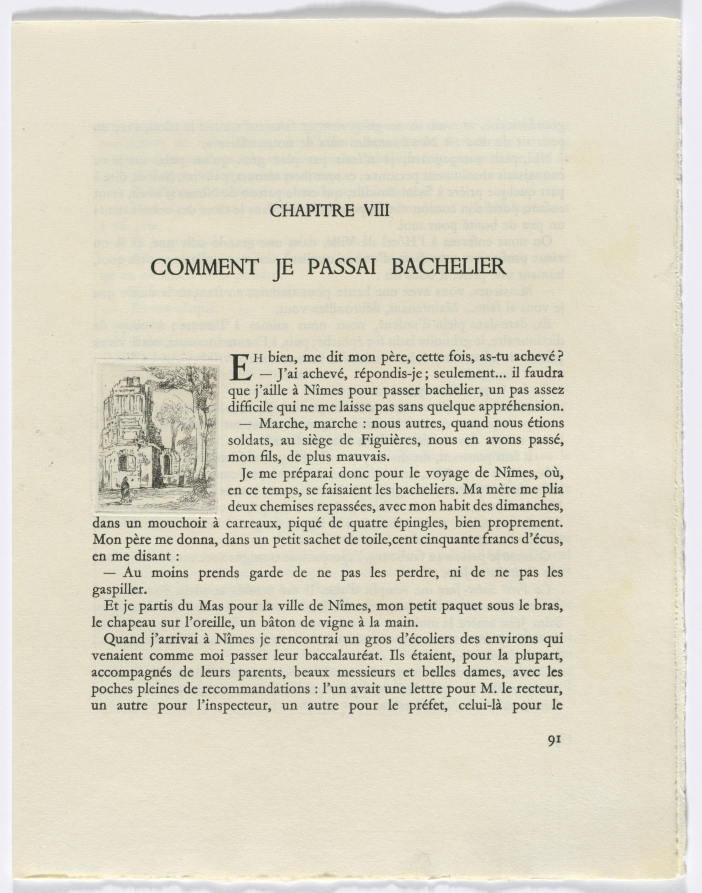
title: Frédéric Mistral: Mémoires et Recits by Frédéric Mistral: building and tree (page 91)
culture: France, 20th century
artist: Auguste Brouet (French, 1872–1941)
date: 1937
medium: etchings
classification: Portfolio